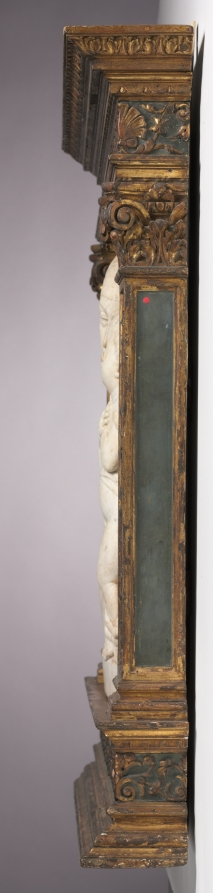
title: Virgin and Child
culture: Italy, Venice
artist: workshop of Pietro Lombardo (Italian, c. 1435–1515)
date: c. 1475–1485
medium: marble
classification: Sculpture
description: In the later 1400s, artists increasingly infused sacred subject matter with a classical vocabulary. The shallow relief and simplified forms ultimately stemmed from ancient sculpture, bringing gravity as well as novelty to a conventional theme. Yet naturalistic elements such as the baby’s bulging navel, chubby wrists, and shirt pulled up to reveal his genitals all humanize Christ, a critical principle of Christian dogma.